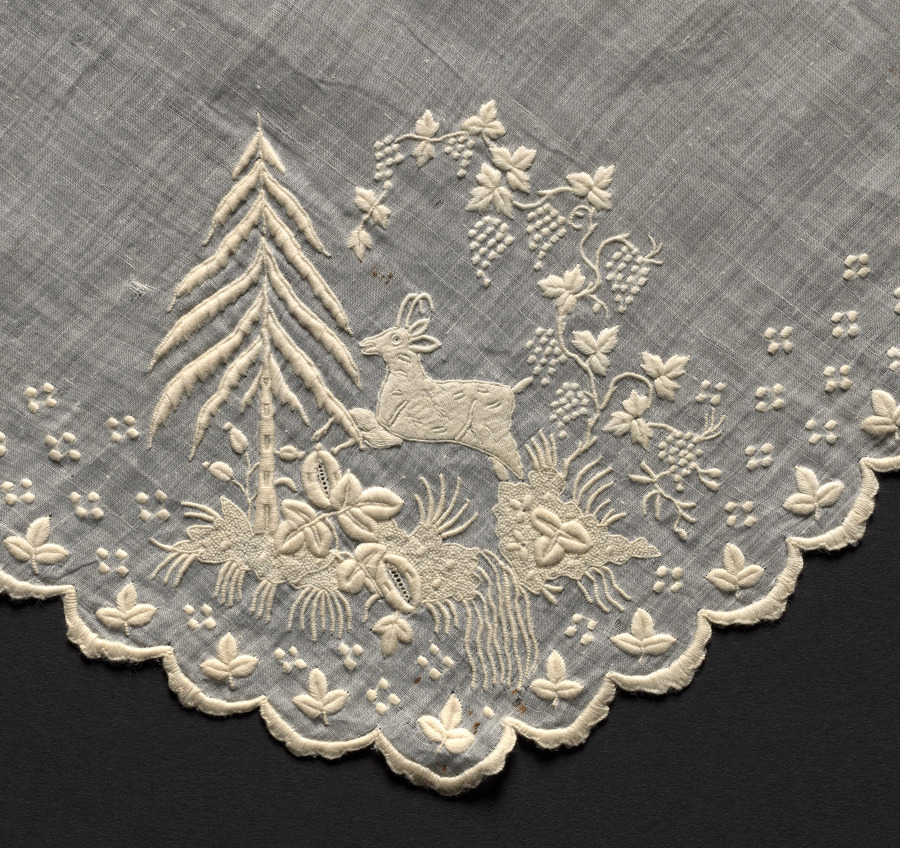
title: Handkerchief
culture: Switzerland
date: 1800s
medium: Plain weave linen: embroidered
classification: Embroidery